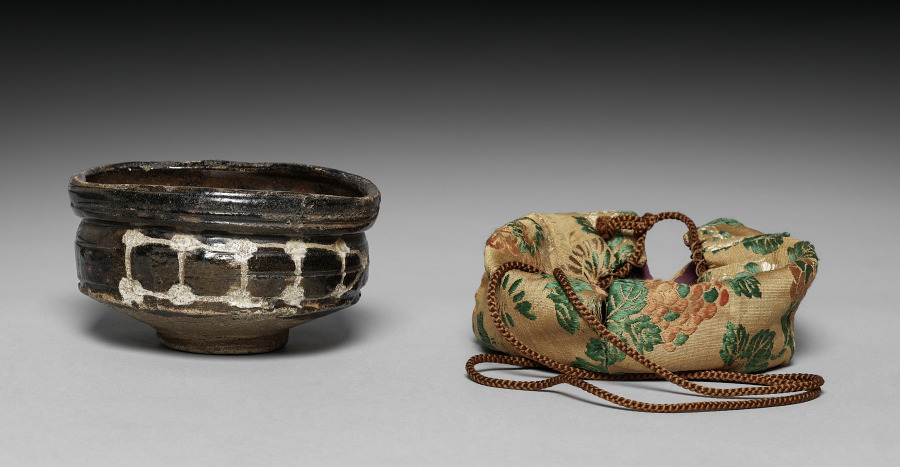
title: Clog-shaped Teabowl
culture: Japan, Momoyama period (1573–1615)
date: early 1600s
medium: Glazed stoneware (Mino ware, Oribe type)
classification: Ceramic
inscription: Mark: cross on base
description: Tea gatherings are fundamental to Japanese culture. Teabowls like this one are the most important objects used in tea practice. Its oblong shape and bold abstract designs are the signature style of the time period in which it was produced. That style is called Oribe, named for the tea master who championed the aesthetic.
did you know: Oribe is a government position. It means the person in charge of textiles.